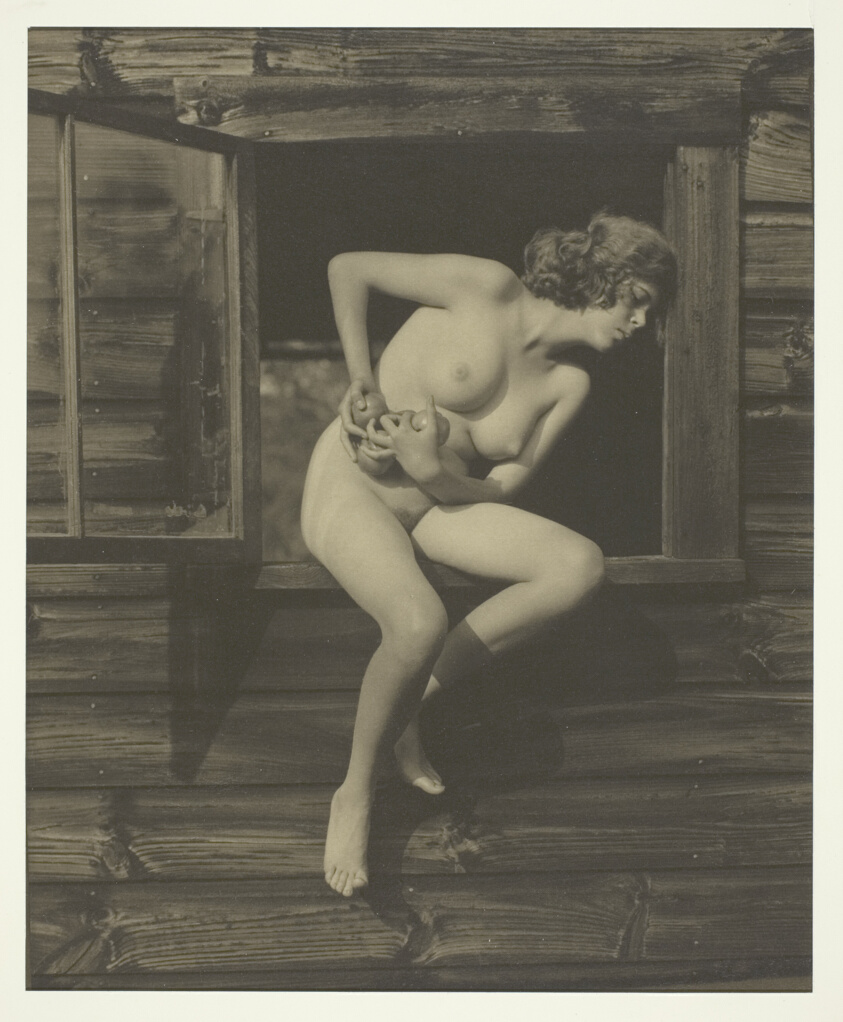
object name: Photograph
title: Georgia Engelhard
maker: Alfred Stieglitz (American, 1864–1946)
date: 1920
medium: Palladium print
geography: United States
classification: palladium print; photographic process; photography; photograph